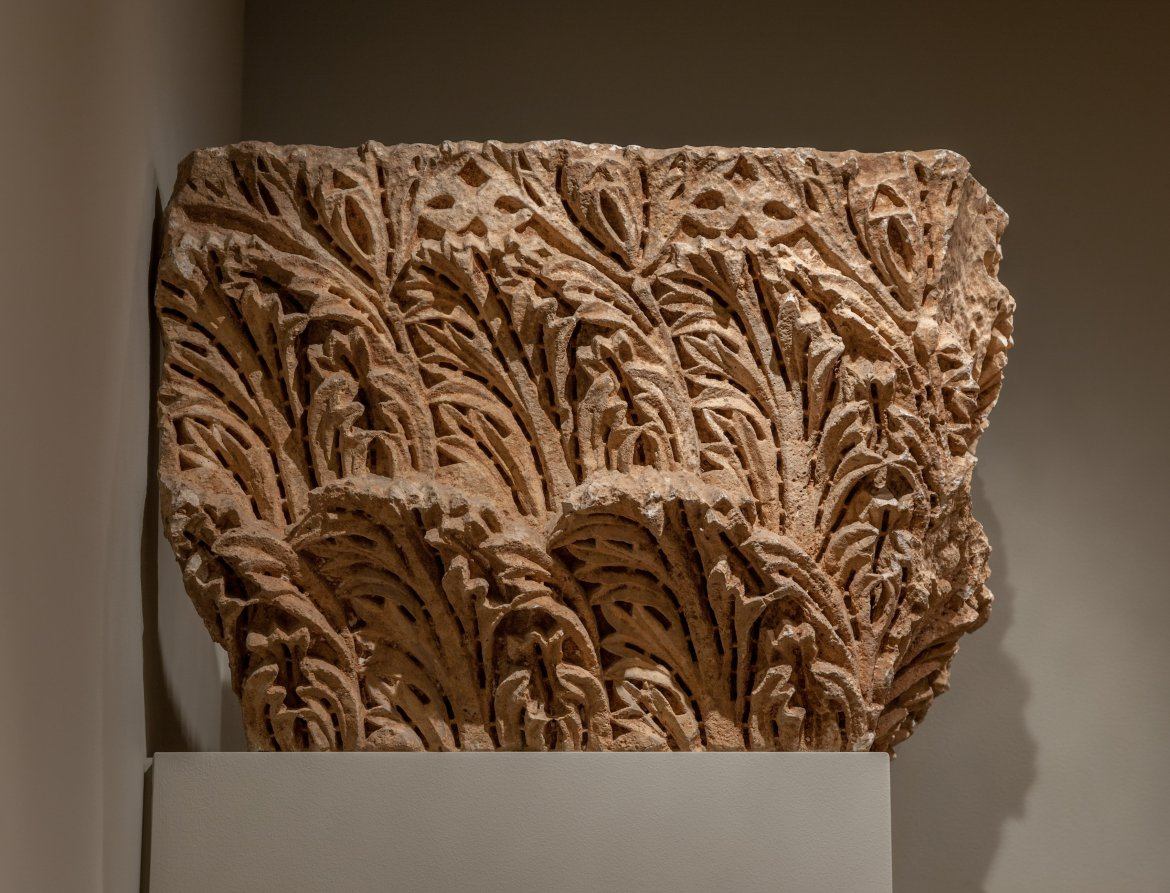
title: Engaged Capital with Windblown Acanthus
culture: Byzantium, Northern Syria, Byzantine period, 5th century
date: 400s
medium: limestone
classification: Sculpture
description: These capitals - the Capital with Acanthus and Crosses and the Engaged Capital with Windblown Acanthus - may have been found in Northern Syria and presumably come from a large and important church. Both capitals are decorated with leaves of acanthus, a fleshy plant with jagged leaves native to the Mediterranean area. One capital is symmetrical with crosses in its ornament, the other is asymmetrical and gives the impression of windblown leaves.